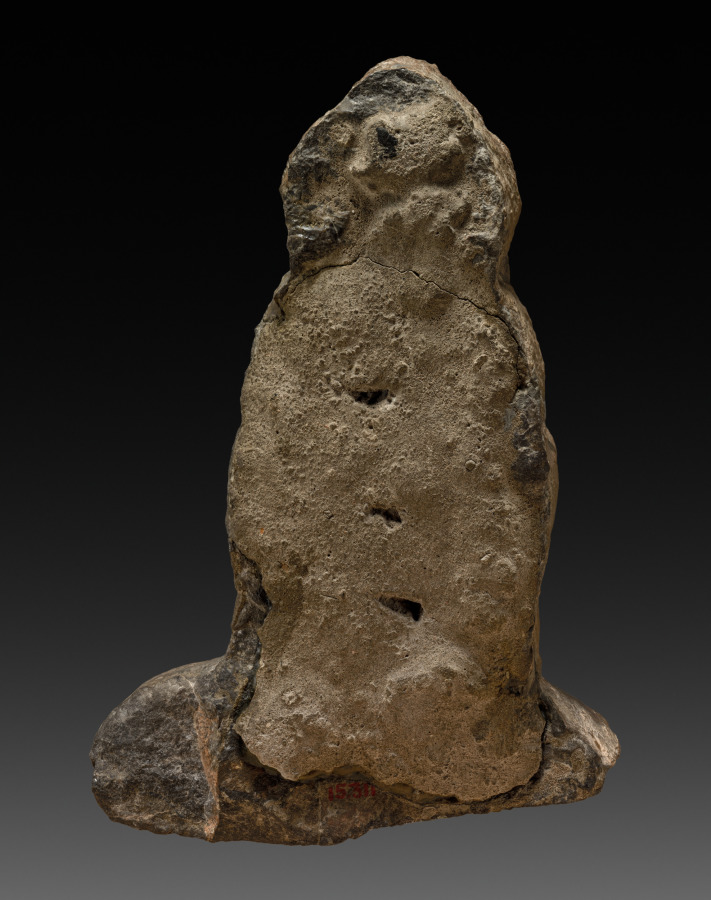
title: Head of Bodhisattva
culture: China, from Lung-mên, Tang dynasty (618-907)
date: 618–907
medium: dark gray limestone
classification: Sculpture